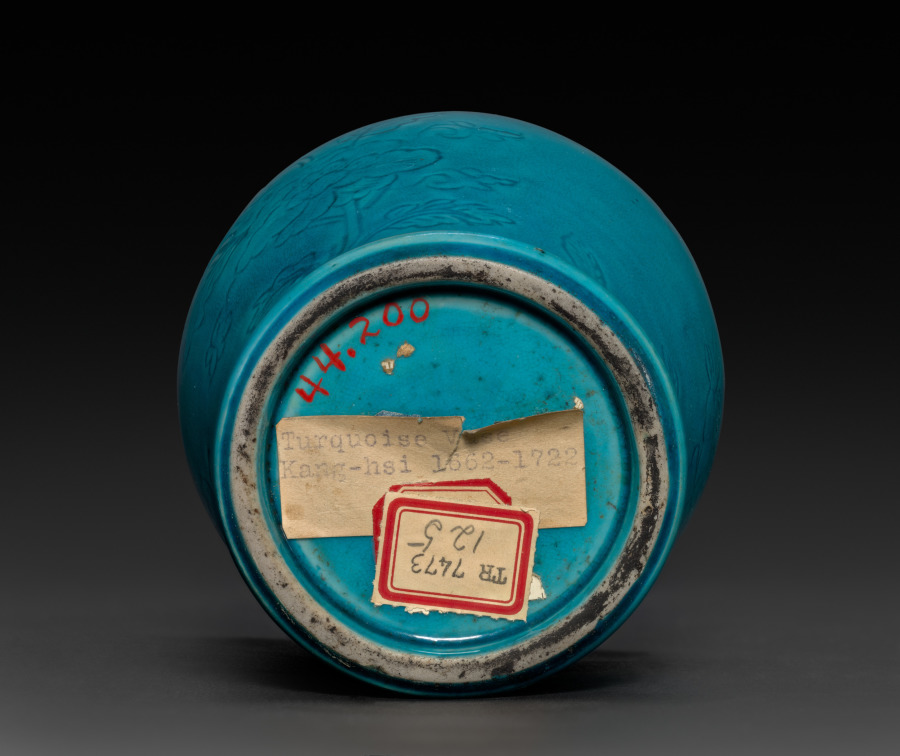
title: Vase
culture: China, Qing dynasty (1644-1911), Kangxi reign (1662-1722)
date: 1662–1722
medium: porcelain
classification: Ceramic